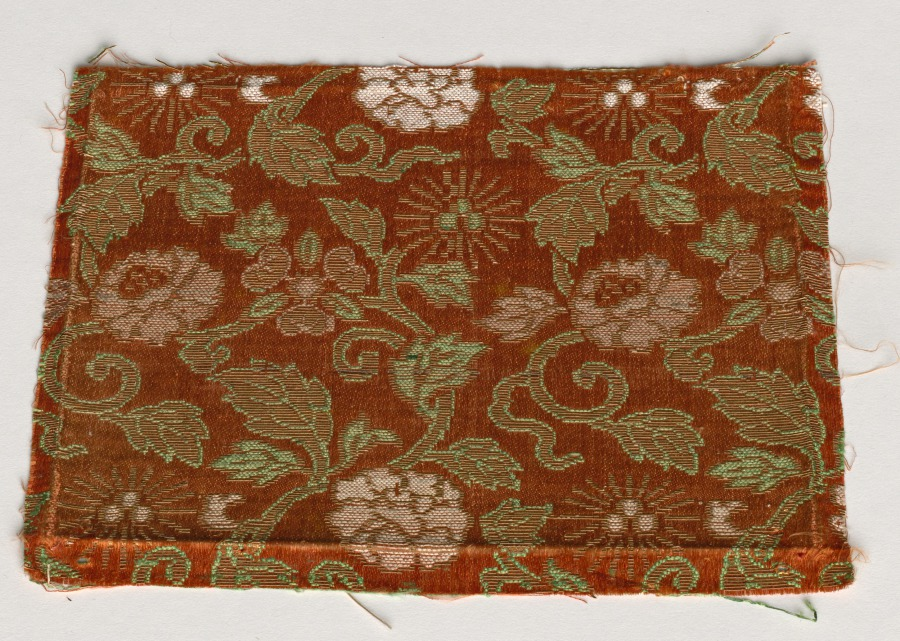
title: Textile Fragment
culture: Japan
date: 1800s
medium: silk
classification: Textile